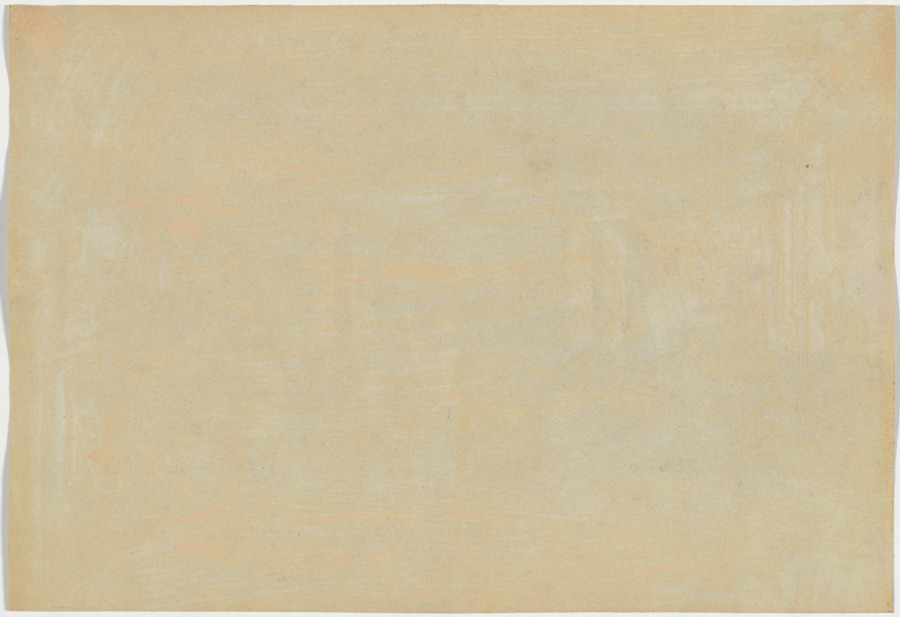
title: Mr. Brown's Horses, Jhansi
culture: India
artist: Raja Deen Dayal (Indian, 1844–1905)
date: 1887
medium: albumen print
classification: Photograph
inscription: No visible inscriptions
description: Imported into India in great numbers by the British, horses were used for both transportation and sports such as riding, polo, and racing. Caring for the animals fell largely to Indian servants. Captions on the photographs’ mounts specify the owners of these animals (note that Major Sparks also has a monkey and pet deer). However, none of the Indian servants is identified. Nor would they have received a copy of the photograph because of their low social status, which was far below that of Deen Dayal.